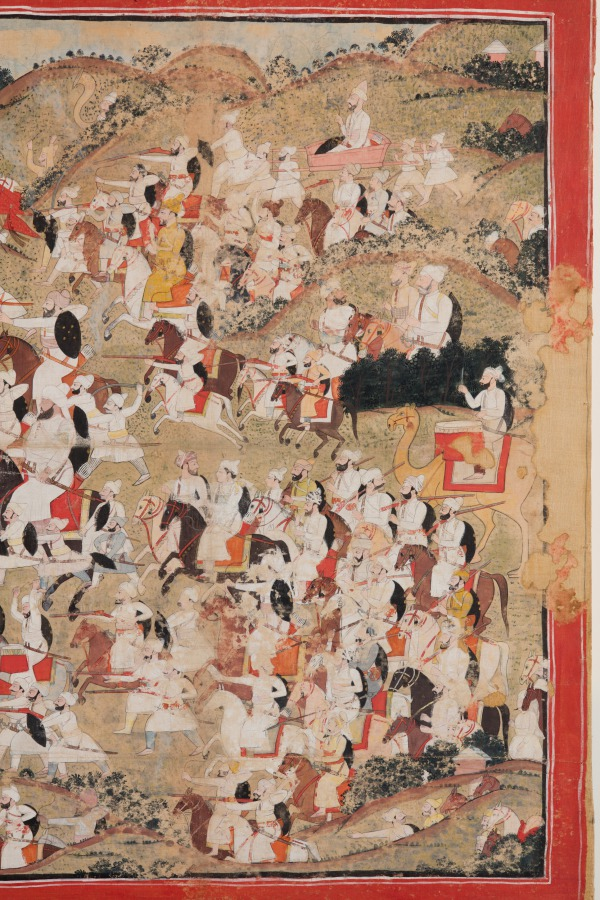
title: Raja Sansar Chand attacking Kangra Fort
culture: Northern India, Pahari kingdom of Kangra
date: after 1782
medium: Gum tempera, ink, and gold on cotton cloth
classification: Painting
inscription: Inscriptions in Takri and Persian. Persian reads: “On the 23rd of the month of Kartik, Samvat 1839 (1782 AD) Sri Maharaja Sansar Chand Bahadur attached Lakkarkot (Nagrakot ?) and the fortress of Kangra, attained victory and made siege intrenchments at the fortress of Kot Kangra.”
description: In 1782, the 17-year-old king of Kangra fought to retake his ancestral kingdom from the Mughals, who had controlled the territory since 1620. He rides a dark brown horse in front of the camel at the far right, blending in among his army and allies. The leftmost panel shows the residents of Kangra fleeing the conflict with their belongings on their heads to the safety of the fortress at the far left, from the walls where cannons are being fired. The main temple, built of gray stone, is in the middle of the composition, marked by red flags.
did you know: The king is 17 years old, beardless, riding a dark brown steed in front of the camel at the far right.